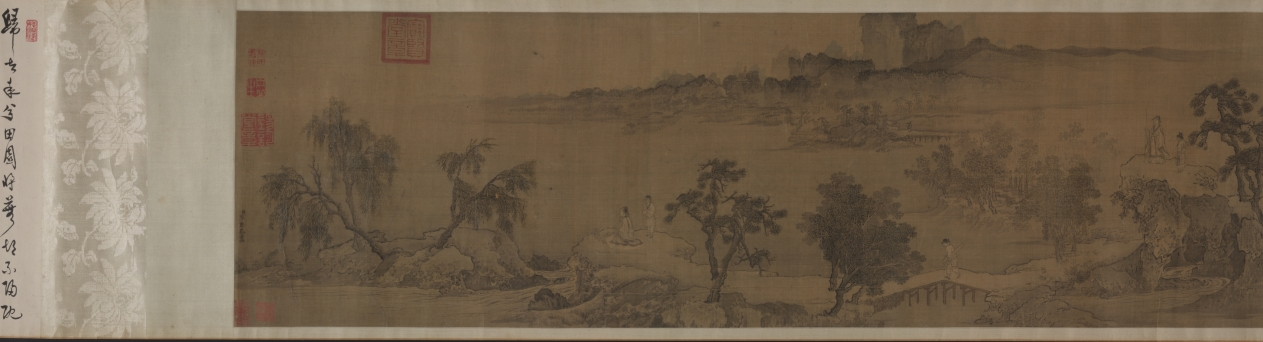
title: Tao Yuanming's Return Home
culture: China, Yuan dynasty (1271-1368)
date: 1300s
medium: Handscroll; ink and slight color on silk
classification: Painting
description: Tao Yuanming's revered poem "Return Home 歸去來辭 (Gui qu lai ci)" powerfully conveys his desire to leave bureaucratic life for the simplicity and authenticity of nature. This sentiment has deeply resonated with generations of Chinese scholars, making it a popular theme in paintings. This handscroll uses continuous narrative depicting Tao in multiple scenes from the poem. Starting on the right, the poet travels to his home. His children wait by the gate, while his wife pauses to tidy her hair before welcoming him. Then, free from the burdens of official service, Tao spends time in both nature and his cottage, where he can again enjoy wine, music, and books.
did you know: Poet Tao Yuanming 陶淵明 (c. 365–427 CE) returned to a secluded life instead of pursuing a civil service career.